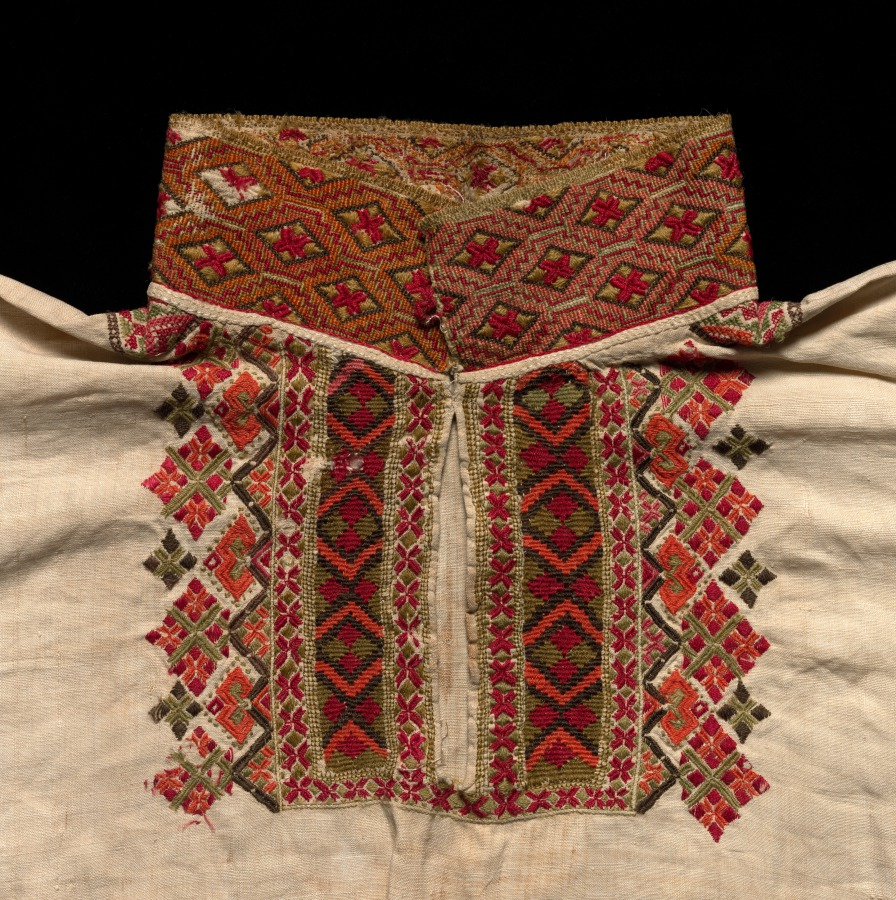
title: Peasant Blouse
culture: Norway, Hardanger, 19th century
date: 19th century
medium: plain weave linen? with embroidery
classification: Garment